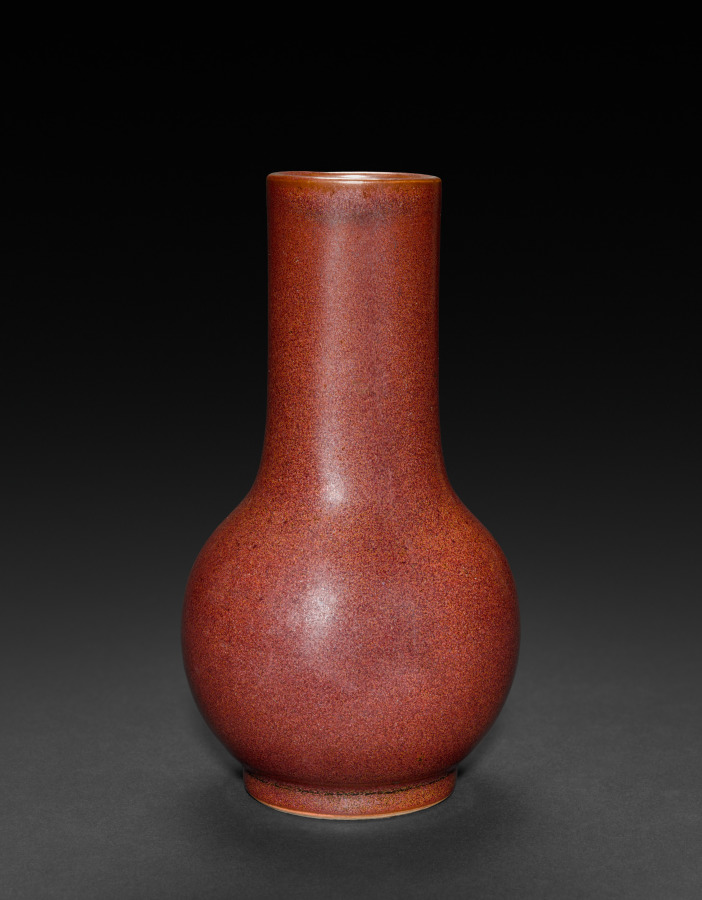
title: Bottle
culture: China, Qing dynasty (1644–1911), Qianlong reign (1736–95)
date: 1736–95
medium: porcelain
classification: Ceramic